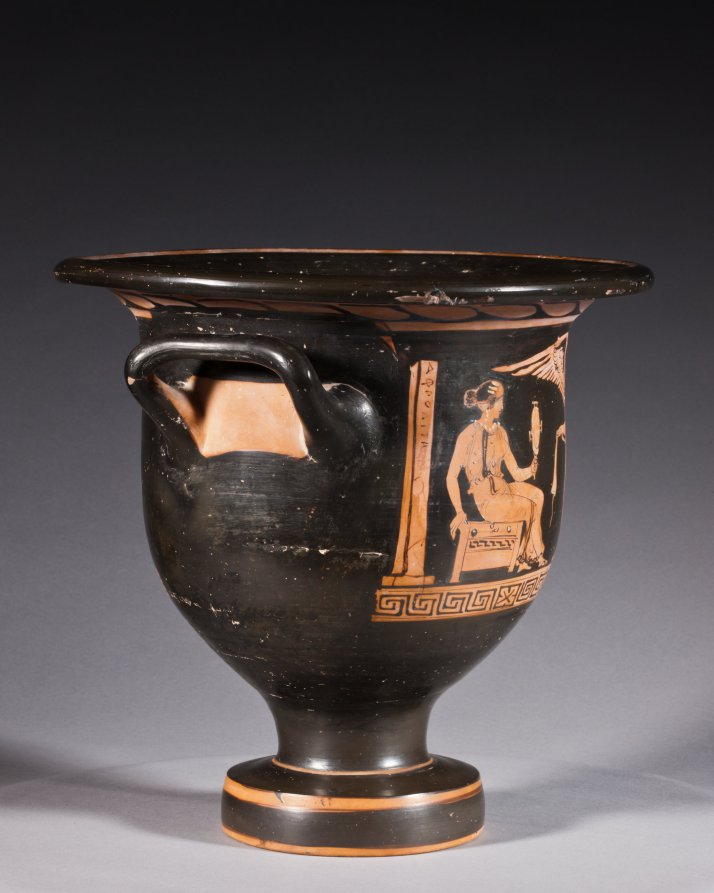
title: Red-Figure Bell Krater (Mixing Vessel): Aphrodite and Eros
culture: South Italian, Apulian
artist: attributed to Graz Painter (South Italian, Apulian, active c. 380–360 BCE)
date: c. 370–360 BCE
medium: ceramic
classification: Ceramic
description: This small mixing vessel shows a finely dressed woman seated on a chest and holding up a mirror to admire herself. Before her stands Eros, the winged god of love, holding a ribbon or sash. Behind the woman stands a pillar with the inscription ΑΦΡΟΔΙΤΗ, or APHRODITE, the goddess of love. Such labels are rare on vases, and scholars debate whether this names the woman shown as Aphrodite herself, with her son Eros, or a bride envisioning herself as Aphrodite, just before her wedding.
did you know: The dancing nude youths on the reverse are unusual; typically they would be standing and draped.